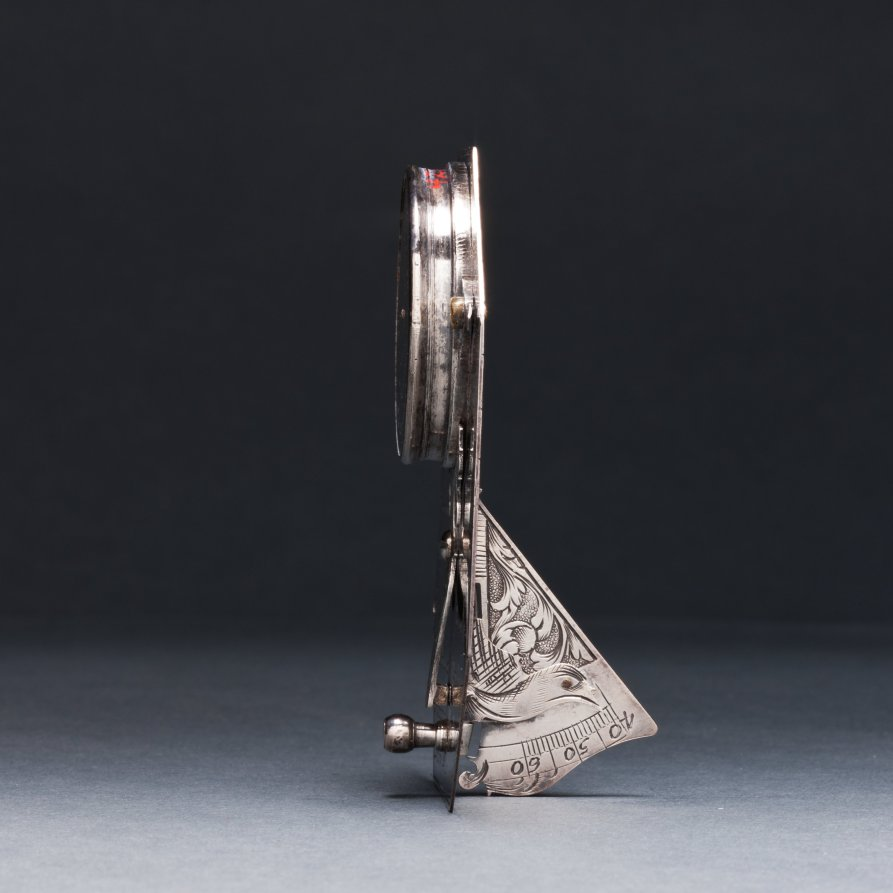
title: Butterfield Sundial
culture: France, 18th century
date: 1700s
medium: silver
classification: Silver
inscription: [Engraved signature above the compass in ribbon band]: "N. BION A Paris"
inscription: [Engraved on the face of the sundial]: “Pour 55° 4-5-6-7-8-9-10-11 50° IIII-V-VI-VII-VIII-IX-X-XI 45° 5-6-7-8-9-10-11 40° -VI-VII-VIII-IX-X-XI'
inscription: [Engraved on the other side]: "Pour 55° -8-7-6-5-4-3-2-1-0 50°-VIII-VII-VI-V-IIII-III-II-I 45°-8-7-6-5-4-3-2-1 40°-VII-VI-V-IIII-III-II-I"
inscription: [Engraved around the compass]: “NORD-OUEST-SUD-EST”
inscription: [Engraved on the back of the sundial]: “Turin 44 Milan 46 Paris 49 Lion 46 Metz 49 Rome 42 Liege 51 Naples 44 Namur 50 Gennes 44 Marseille 43 Grenoble 45 Bayonne 43 Bruxelle 51 Londres 52 Nantes 47 Vienne 48 Toulon 43 Tours 47 Lille 51”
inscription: [Engraved around the back of the compass]: “Venise 45 Strasbourg 49 Amsterdam 52 Hambourg 54 Varsovie 52 La Rochelle 46”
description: Butterfield-type sundials are characterized by their adjustable gnomons, metal flaps that cast a shadow on the dial’s face to indicate the hour, and geographical indices. This sundial has a scale adjustable between latitudes of 40° to 60° north. The latitudes of 26 European towns are engraved on its back for quick reference. With an intricately engraved silver face, it would have functioned as a fashionable traveler’s accessory.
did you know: Butterfield-style sundials were named after Micheal Butterfield, an English scientific and mathematical instrument maker who worked in Paris between 1674 and 1724.